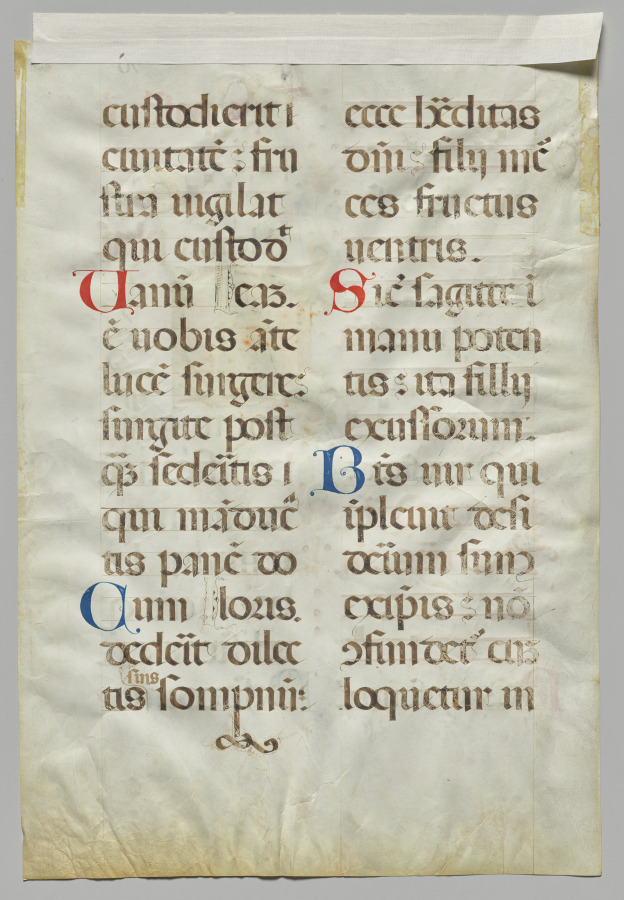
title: Leaf from an Antiphonary: Text (verso)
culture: Italy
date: c. 1475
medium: Ink, tempera, and gold on vellum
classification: Manuscript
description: The leaf comes from an Antiphonale, a liturgical book that contains the melodies and texts of all the chants of the Liturgy of the Hours, the antiphons. These include the psalms, responsories and hymns, which are arranged in the book in the order of the church year. The antiphons served clergymen and monks or nuns for their service in the choir stalls of the church.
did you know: Churches had mostly two copies of this book because the clergymen were sitting in the coir stall on both sides of the high altar and therefore needed a copy for each side.